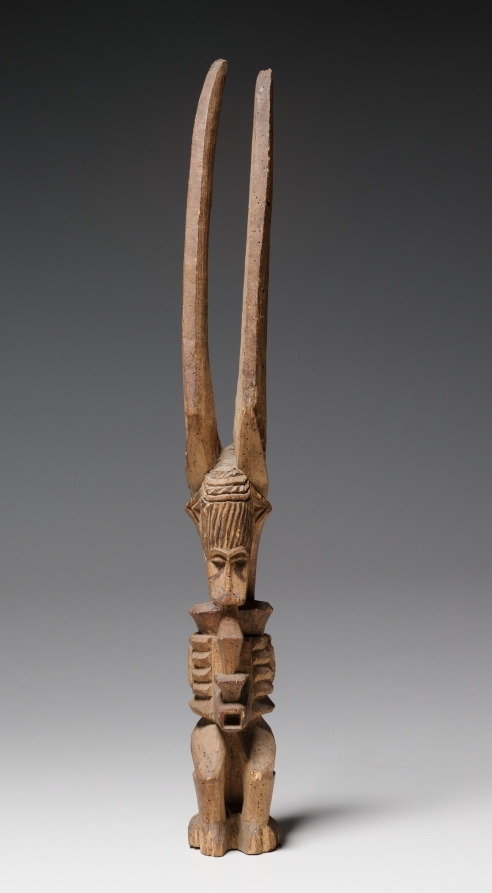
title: Shrine Figure (Ikenga)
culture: Africa, West Africa, Nigeria, Igbo style, unknown carver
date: early 1900s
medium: wood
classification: Sculpture